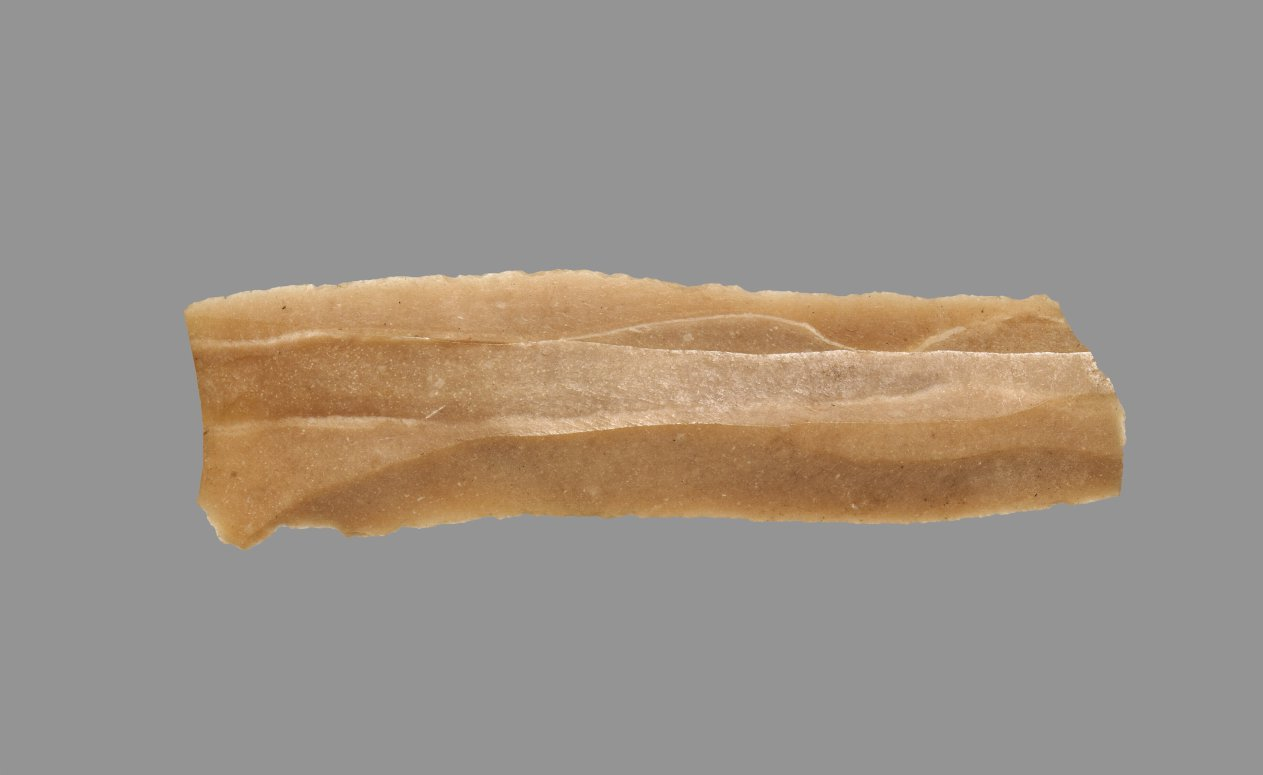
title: Sickle Blade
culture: Egypt, Middle Kingdom (2040–1648 BCE), Dynasty 12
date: 1980–1801 BCE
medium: flint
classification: Implements